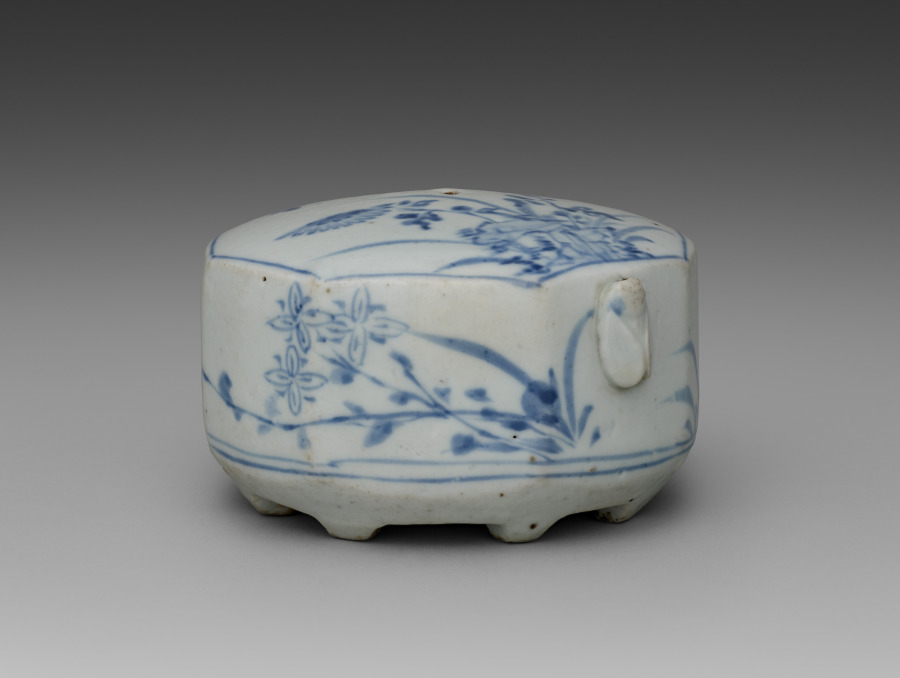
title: Octagonal Water Dropper Decorated with Flower Design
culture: Korea, Joseon dynasty (1392–1910)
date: late 1700s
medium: Porcelain with blue and white decoration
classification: Ceramic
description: A water dropper was an essential utensil for a literati man of the Joseon dynasty (1392–1910) in writing calligraphy. It was used to add water, by small drops, to an inkstone while grinding an ink stick. This work has a small spout in the shape of a cicada. This decorative element not only adds a sense of whimsical sensibility to this scholarly utensil, but also aims to symbolize the aspiration for scholarly achievement—as loud as the cicada’s song.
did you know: A small spout in the shape of a cicada is placed on one of the octagonal sides. This decorative element not only adds a sense of whimsical aesthetic sensibility to this scholarly utensil, but also aims to symbolize the aspiration for scholarly achievement—as loud as the cicada’s song.